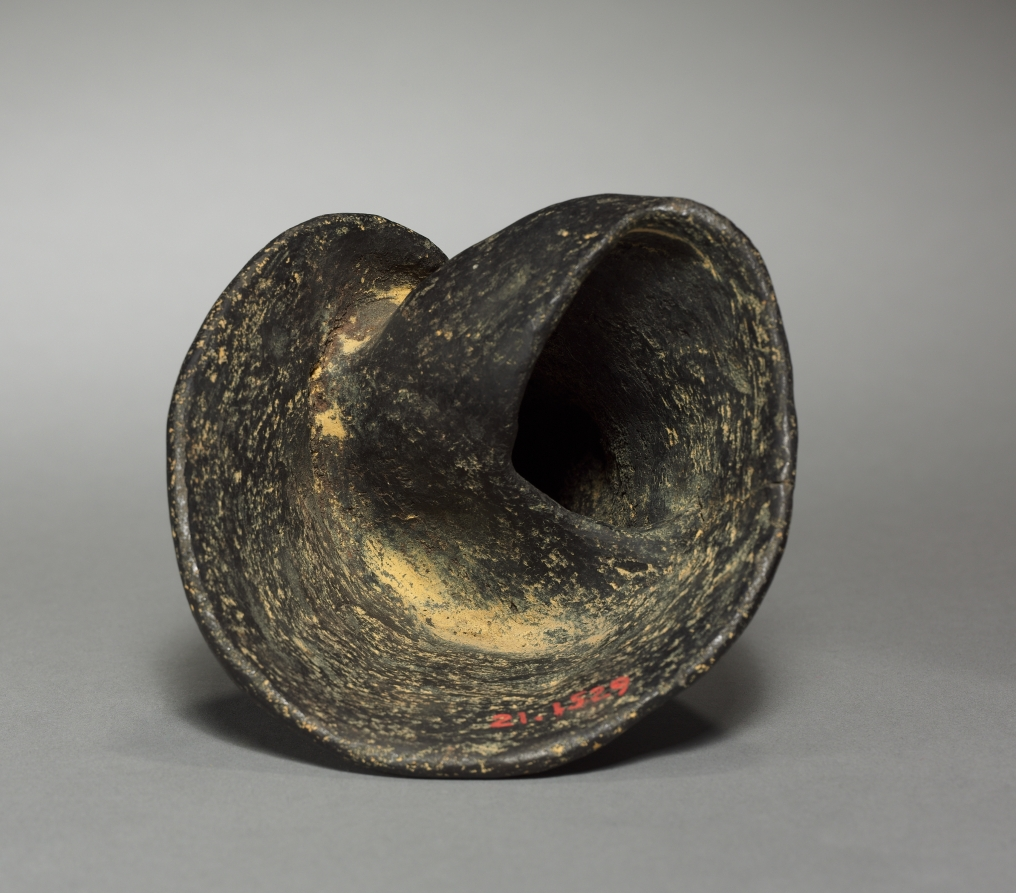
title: Ornament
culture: Colombia, 19th-20th century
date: before 1921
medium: black ware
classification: Ceramic